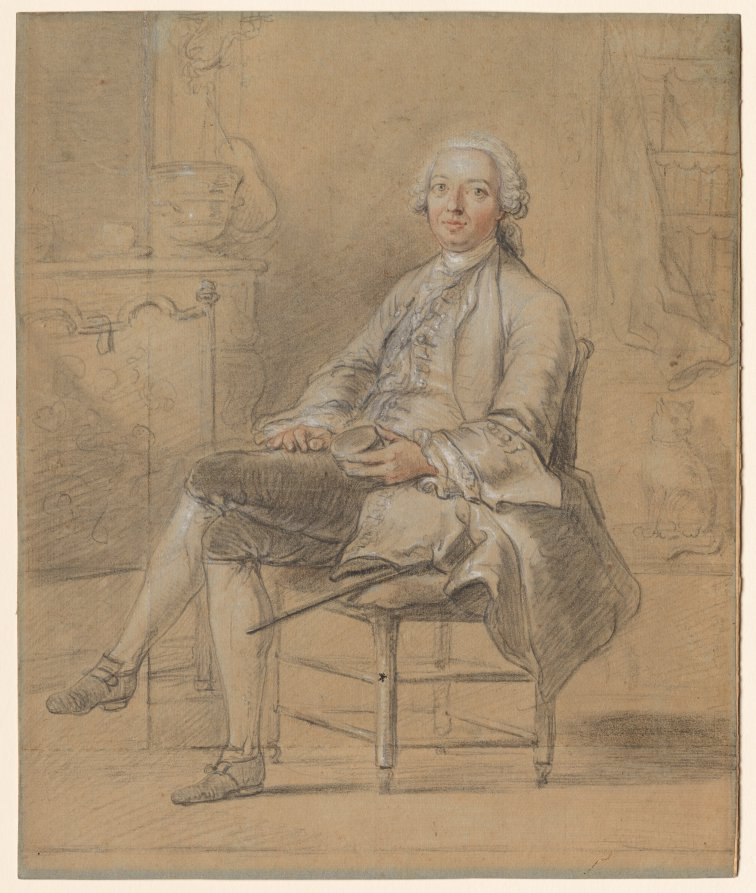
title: Seated Man Holding a Snuff Box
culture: France, Paris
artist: attributed to Louis Aubert (French)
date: c. 1750–1760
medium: black and red chalk, heightened with white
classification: Drawing